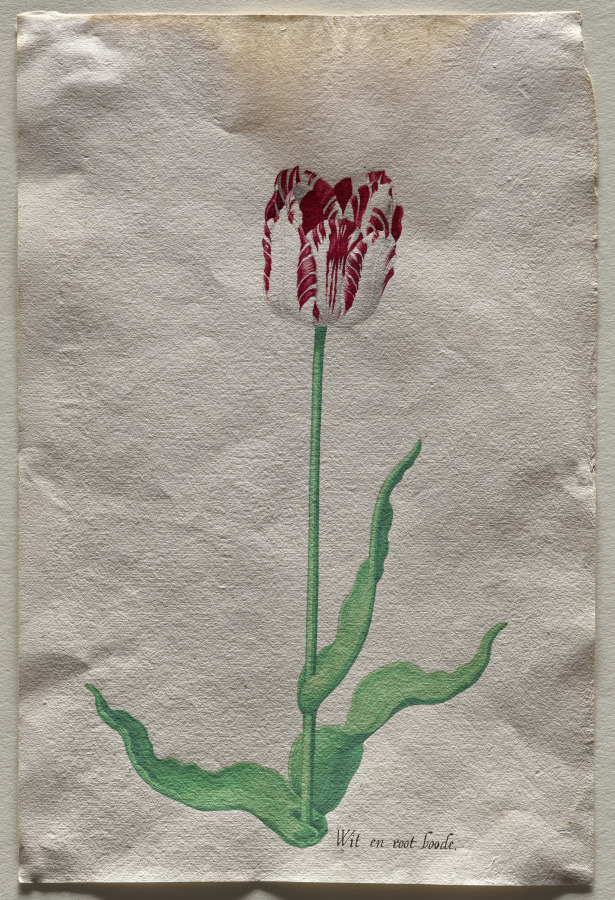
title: Study of a Tulip (Wit en root boode)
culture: Netherlands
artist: Pieter Holsteyn II (Dutch, c.1612–1673)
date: c. 1645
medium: Point of brush and transparent and opaque watercolors with traces of graphite and gum glazing on antique laid paper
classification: Drawing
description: This image of a tulip was made as part of a tulip book used as a grower’s marketing tool during the so-called tulip mania, a speculative bubble in 17th-century Holland, when ten tulip bulbs could cost more than a stately Amsterdam canal house. The striations on the tulip, which were caused by a virus in the bulb, made it especially valuable. Pieter Holsteyn II was one of many artists in the Netherlands at the time who specialized in botanical illustration.This tulip's Dutch name, inscribed on the sheet, means "white and red messenger."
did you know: In 17th-century Holland, some tulip bulbs were as expensive as a stately Amsterdam canal house.